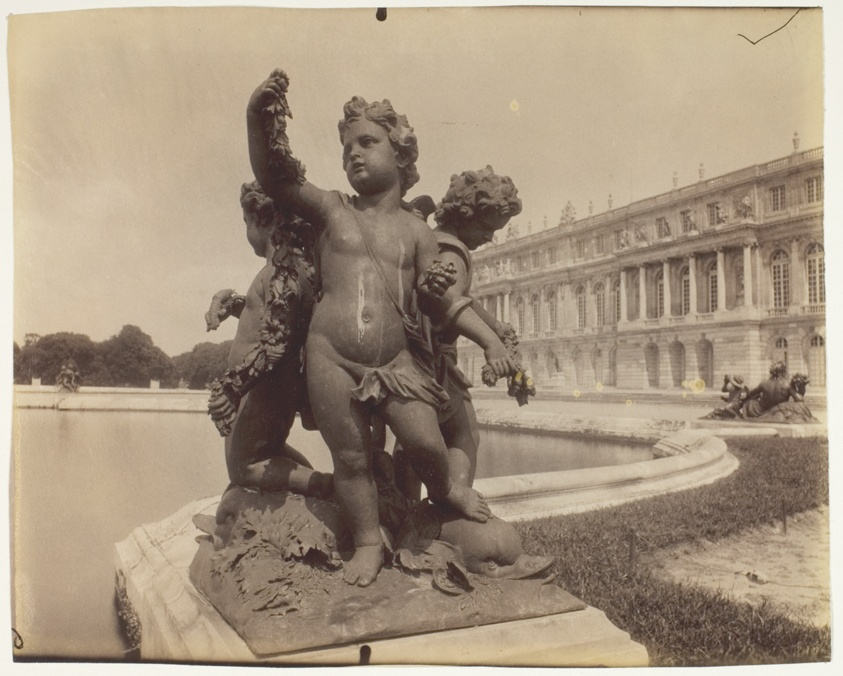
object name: Photograph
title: Versailles, Coin de Parc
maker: Jean-Eugène-Auguste Atget (French, 1857–1927)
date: 1901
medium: Albumen print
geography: France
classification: albumen silver print; photographic process; photography; photograph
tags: Collected by Hugh Edwards